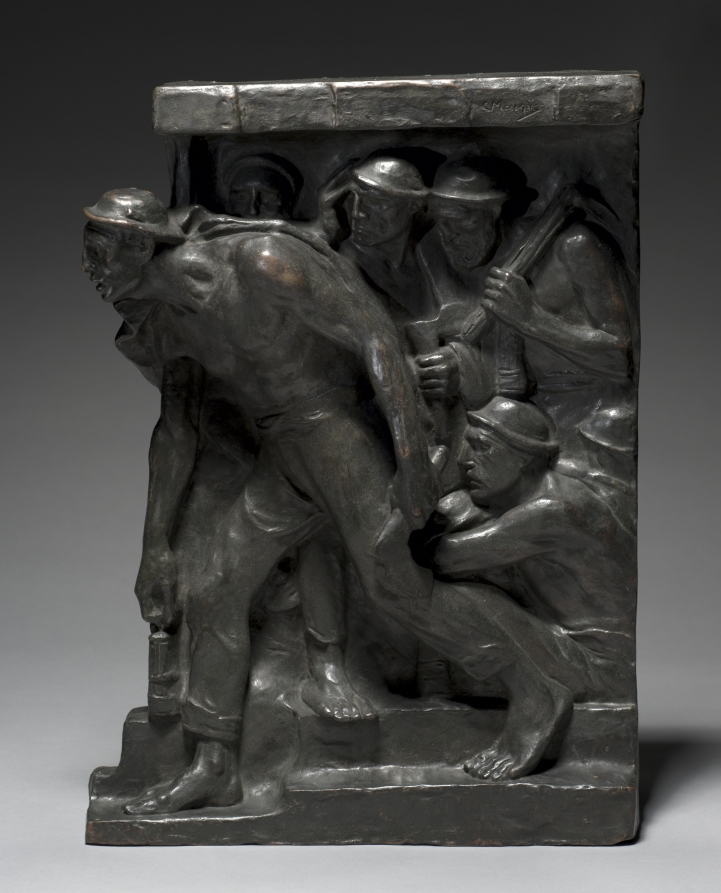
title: The Miners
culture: Belgium, 19th century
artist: Constantin Meunier (Belgian, 1831–1905)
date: c. 1890 – 1900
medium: bronze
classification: Sculpture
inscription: Signed on top: "C. Meunier"; inscribed on right side: "Atelier C. Meunier, 50 Rue (?)"